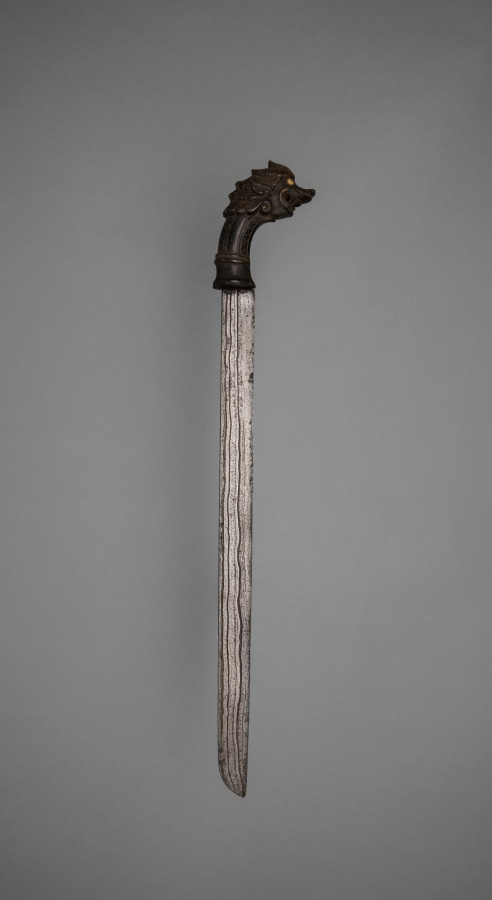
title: Sword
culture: Indonesia, Sulawesi (Celebes)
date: before 1918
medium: metal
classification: Arms and Armor